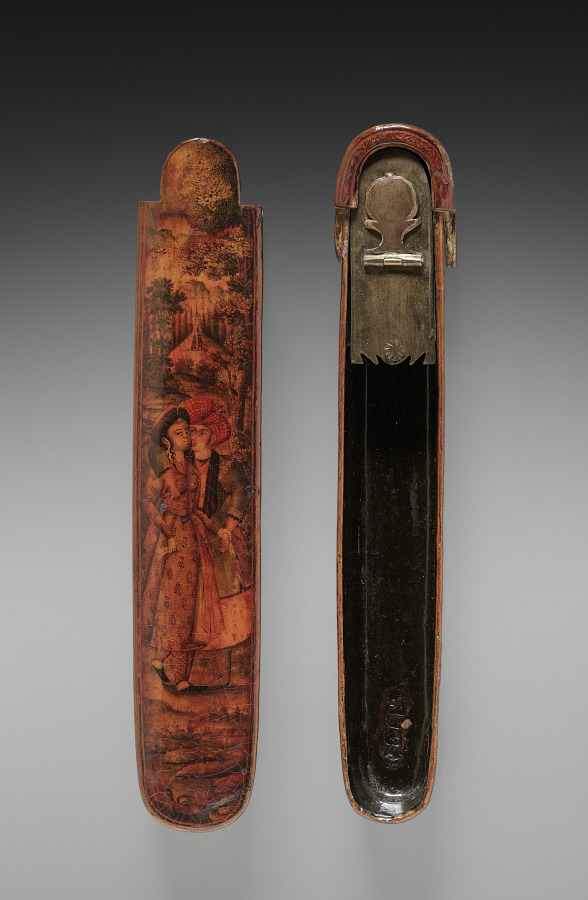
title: Pen and Ink Box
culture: Iran, probably Isfahan, Safavid period (1501–1722)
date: 1667–98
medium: Varnished lacquer and opaque watercolor over papier-mâché, ink, and copper alloy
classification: Lacquer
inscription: 1109